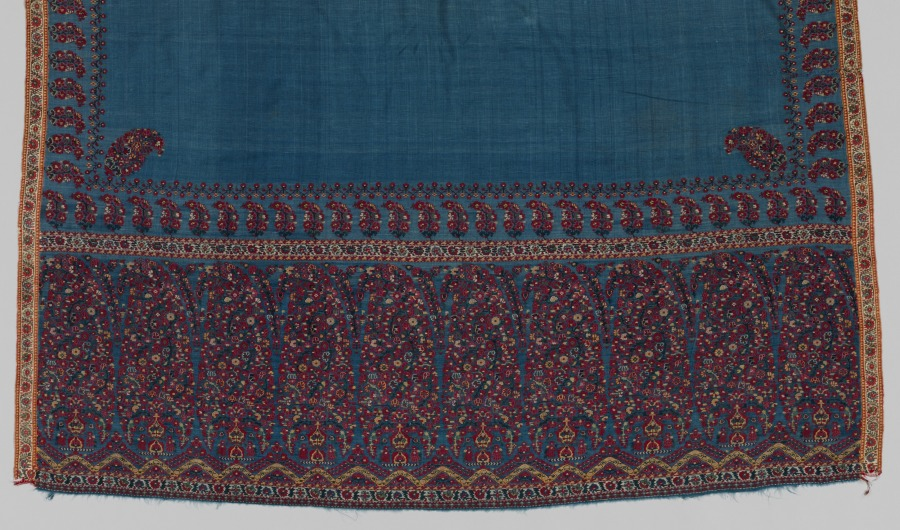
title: Shawl with boteh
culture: India, Kashmir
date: 1820–1830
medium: 2/2 twill tapestry weave, double interlocked: wool, possibly pashmina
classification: Textile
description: Thousands of luxurious shawls imported from Kashmir, India, were status symbols that European-manufactured imitations could not equal. Those woven in Paisley, Scotland, gave rise to the popular term paisley. Their representation in portraits records the evolution of shawl fashions, which helps to date surviving examples. The coveted quality of Kashmir shawls was achieved with luxurious fine goat hair woven in twill tapestry to form small colorful blossoms. Such shawls are lightweight, supple, and warm. A plethora of blossoms arranged in small vases on stands form the large paisley or boteh motifs, while smaller versions enliven the sides of the field. Such floral displays evolved from blossoming plants possibly in 16th-century India.